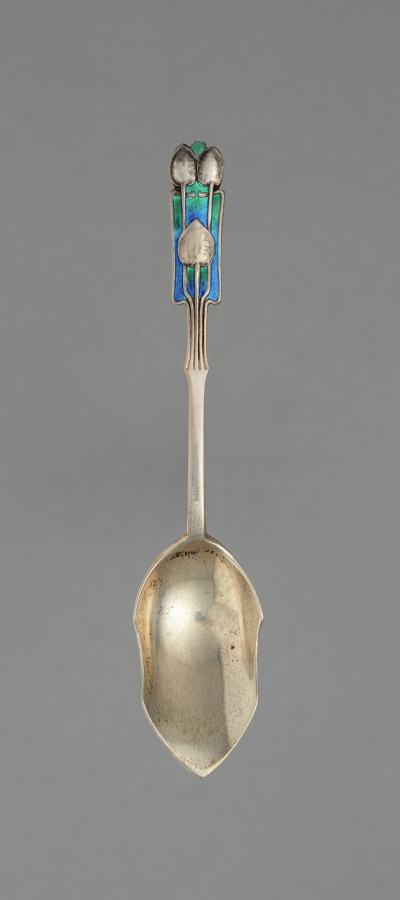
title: Set of six Spoons in Original Box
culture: England, London, 19th century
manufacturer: Liberty and Company (British)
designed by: attributed to Archibald Knox (British, 1864–1933)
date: c. 1895–1910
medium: Silver, enamel decoration and leather box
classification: Silver